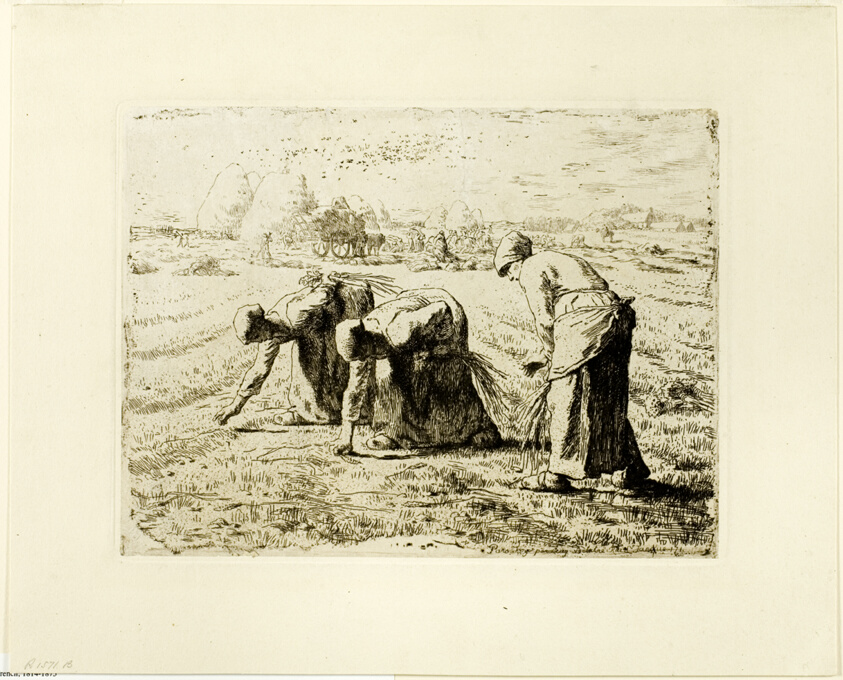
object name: Print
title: The Gleaners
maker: Jean François Millet (French, 1814-1875); printed by Auguste Delâtre (French, 1822-1907)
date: 1855–56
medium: Etching and drypoint on ivory chine, laid down on ivory wove paper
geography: France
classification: etching; print; prints and drawing